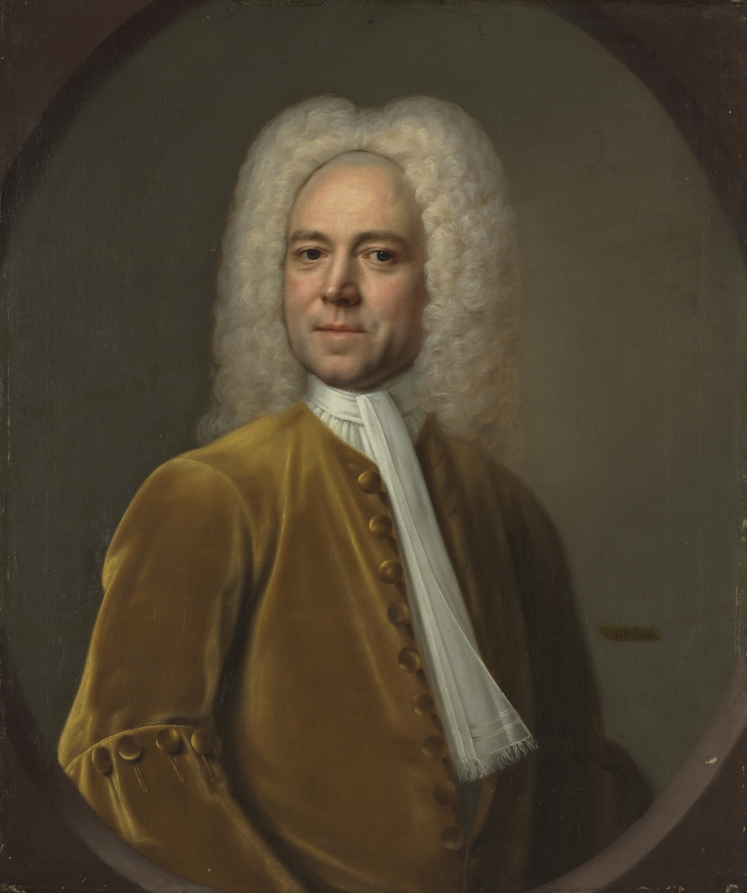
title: Portrait of a Man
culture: England, 18th century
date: c. 1730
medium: oil on canvas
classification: Painting